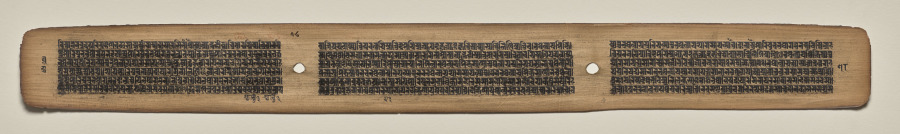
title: Text, Folio 78 (verso), from a Manuscript of the Perfection of Wisdom in Eight Thousand Lines (Ashtasahasrika Prajnaparamita-sutra)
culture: Eastern India, Bihar, Vikramashila Monastery. Painting: Nepal, Kathmandu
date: Sunday, September 14, 1119 (year 239 of the Newar Samvat in the month of Ashvina)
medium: gum tempera and ink on palm leaves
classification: Painting